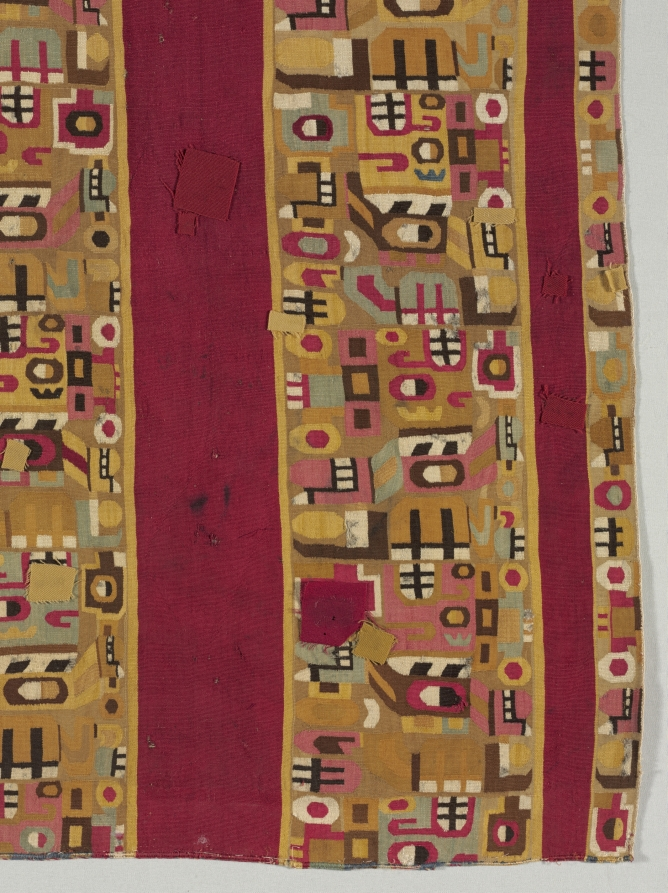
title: Tunic with Sacrificer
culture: South America, Peru, Central Andes, Middle Horizon, Wari people, 7th-11th century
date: 600–1000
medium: camelid-fiber, cotton; tapestry weave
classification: Textile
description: An extremely abstract supernatural sacrifice repeats in different colors and orientations across the body of this tunic, which was shortened on one side in antiquity. Look for the toothy black-and-white mouth in the sacrificer's upward-gazing head; other facial features include a button nose and a vertically divided eye. The figure holds the L-shaped haft of an axe behind its back and, at the front of its body, a short staff with a severed, upside-down human head on the top.